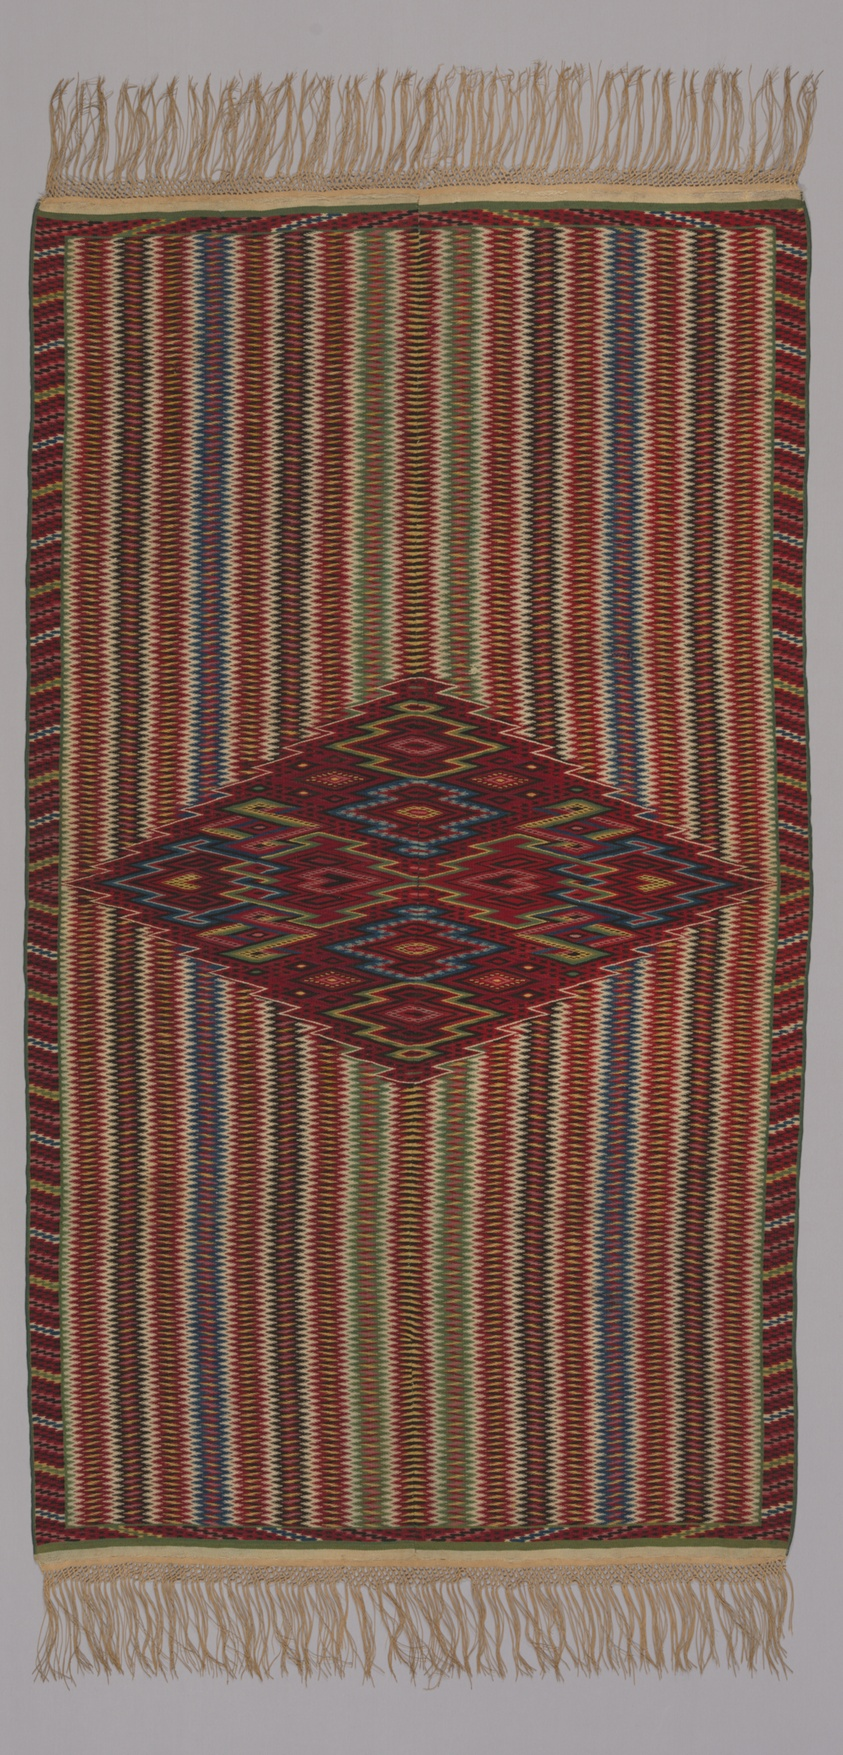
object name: Textile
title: Man's Sarape (Wearing Blanket)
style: Folk Art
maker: Saltillo, Coahuila, Mexico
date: 1800–50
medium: Cotton and wool, slit and single dovetail tapestry weave; edged with cotton, knotted fringe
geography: Saltillo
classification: textile; weaving; garment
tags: stripes, diamond shapes, diagonals, zigzags